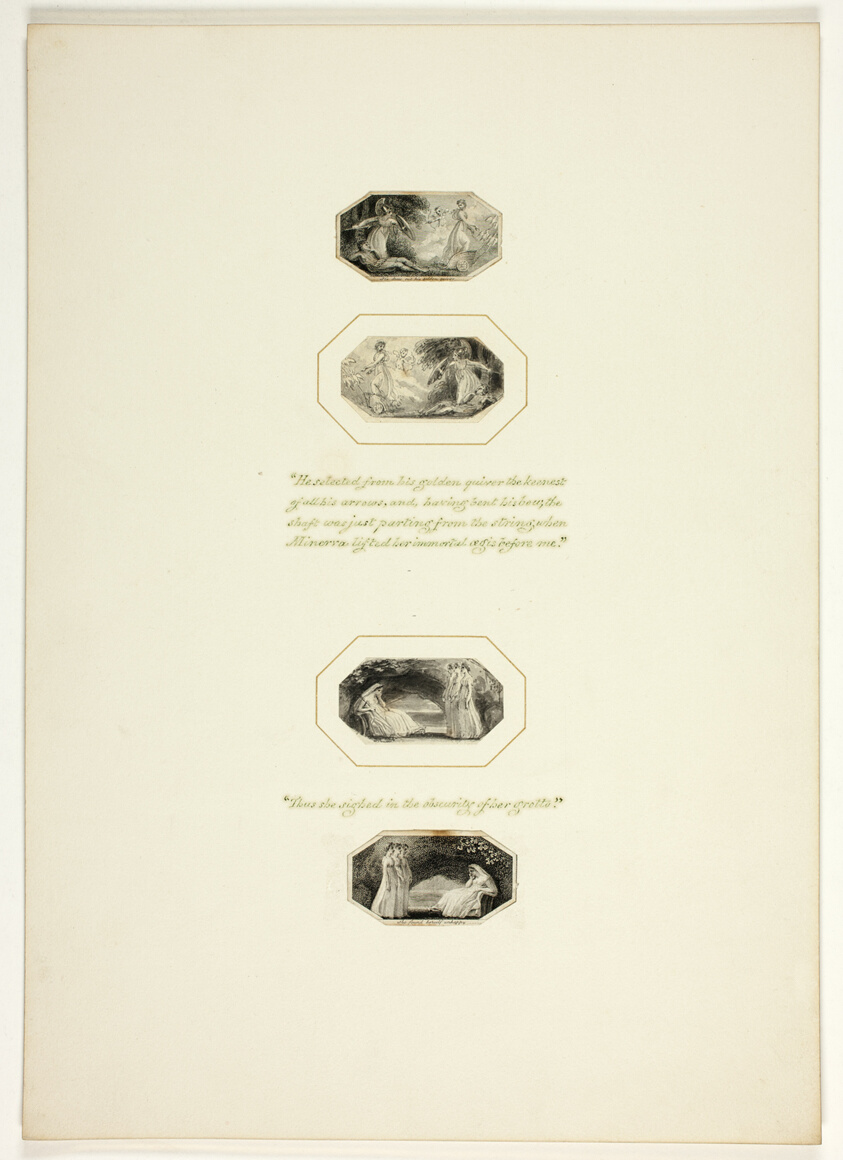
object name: Drawing and Watercolor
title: Study for a plate from Telemachus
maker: Thomas Stothard (English, 1755-1834)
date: c. 1797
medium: Ink wash on paper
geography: England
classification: ink or chalk wash; drawings (visual works); prints and drawing